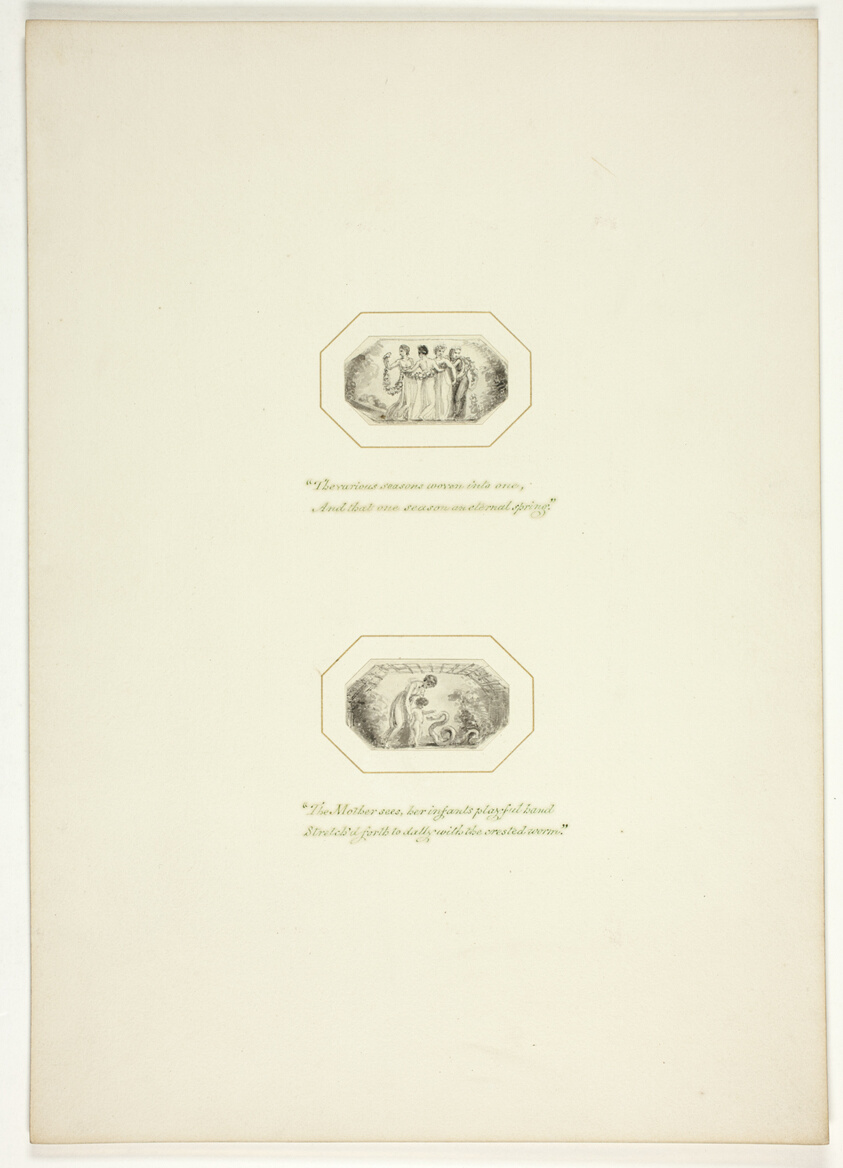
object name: Drawing and Watercolor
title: Study for a plate from The Task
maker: Thomas Stothard (English, 1755-1834)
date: c. 1800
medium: Ink wash on paper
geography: England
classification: ink or chalk wash; drawings (visual works); prints and drawing